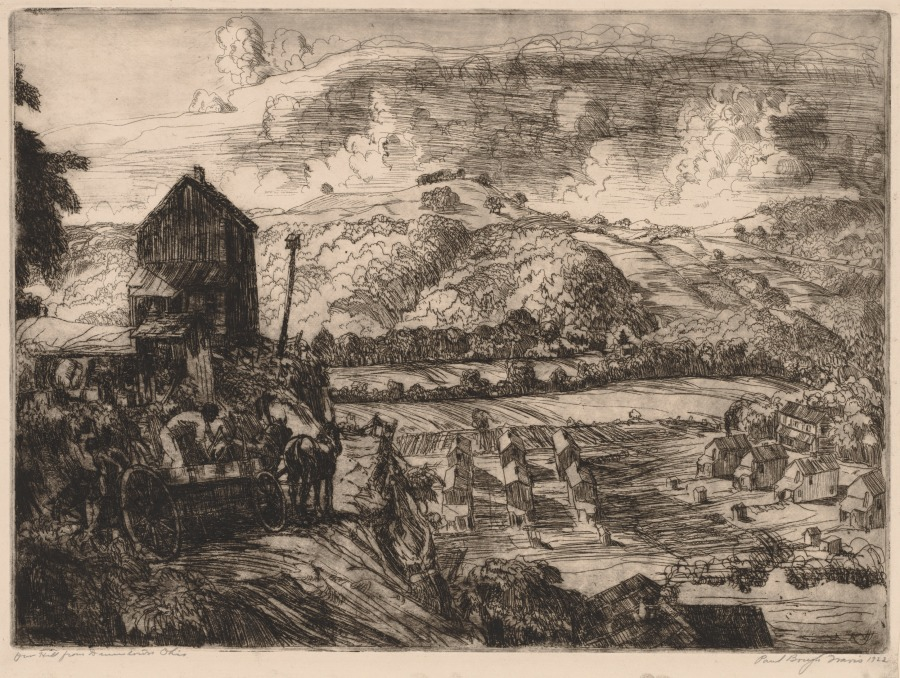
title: Our Hill from Dumstown, Ohio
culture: America, Ohio, Cleveland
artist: Paul B. Travis (American, 1891–1975)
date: 1922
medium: etching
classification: Print